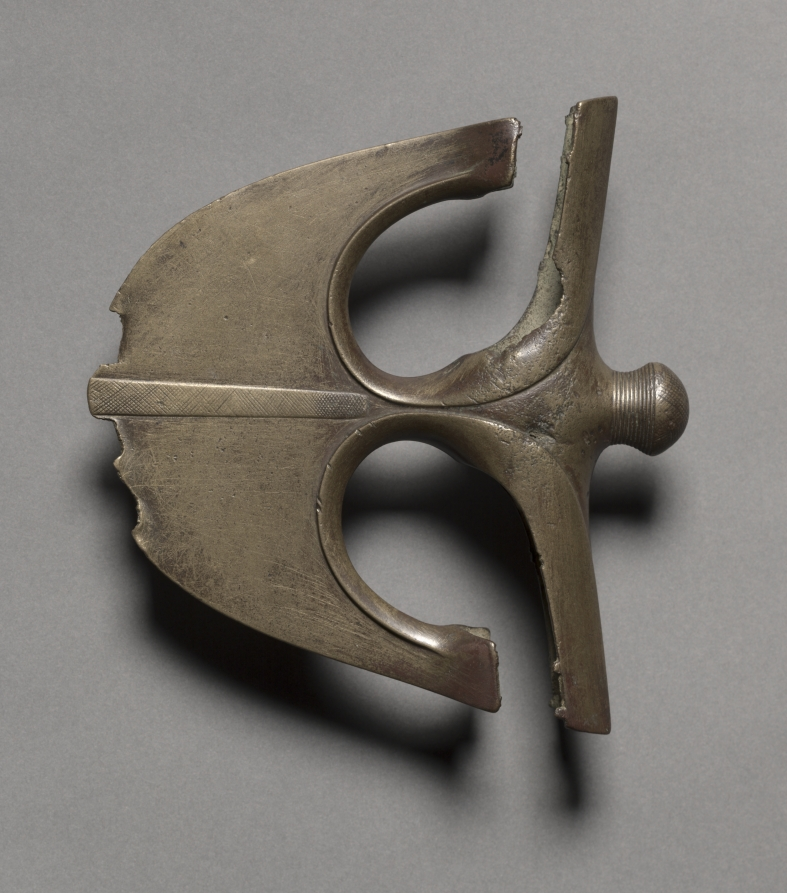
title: Duck-Billed Axe Head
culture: Egypt, New Kingdom (1540–1069 BCE), Dynasty 18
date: 1540–1296 BCE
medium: bronze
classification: Implements